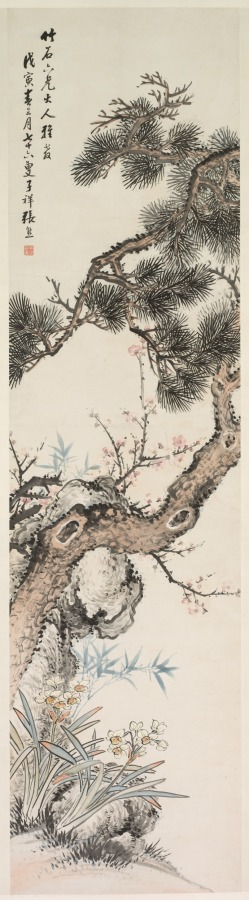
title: Three Purities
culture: China, Xiaxing, Qing dynasty (1644-1911)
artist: Zhang Xiong (Chinese, 1803–1886)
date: 1800s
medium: hanging scroll, ink and color on paper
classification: Painting